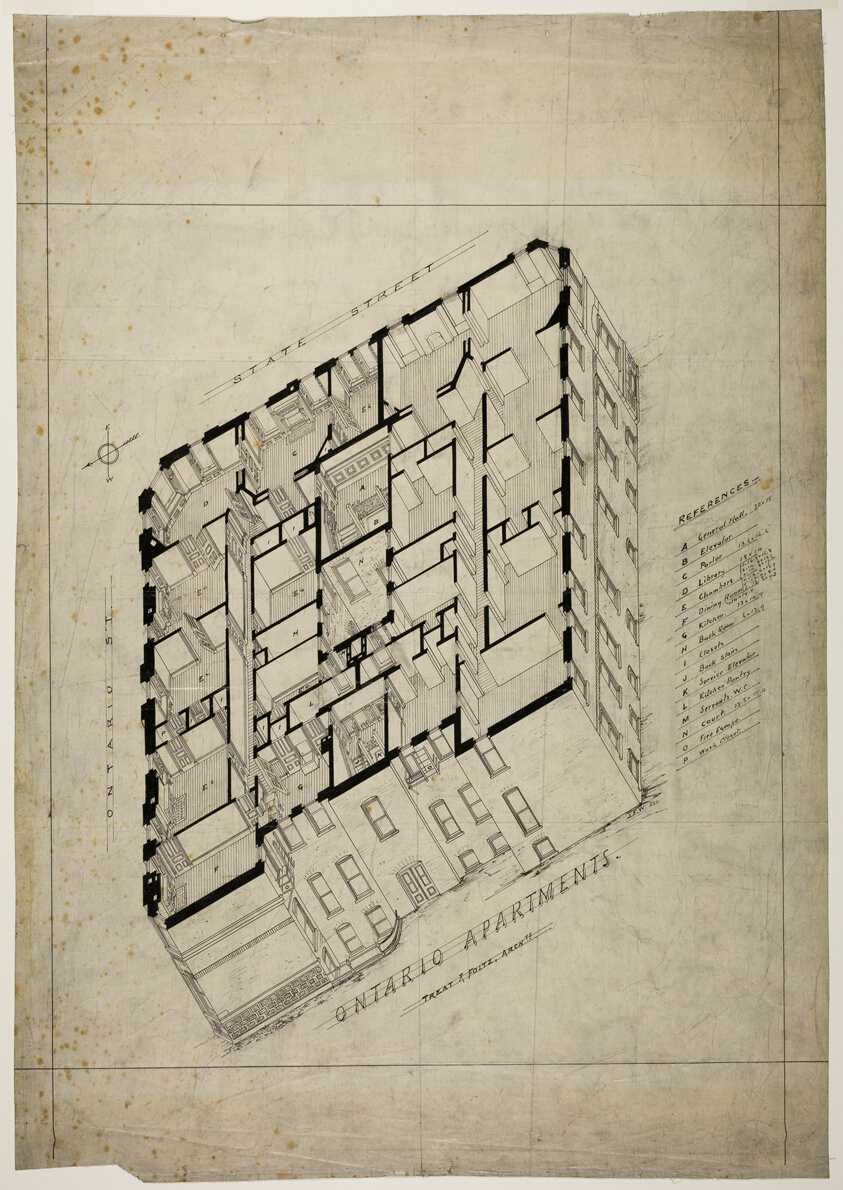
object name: Architectural Drawing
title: Ontario Apartment Building, Chicago, Illinois, Isometric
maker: Treat and Foltz; American, 1871-1897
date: c. 1880/81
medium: Ink and ink wash on linen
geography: Chicago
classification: working drawing; architectural drawing